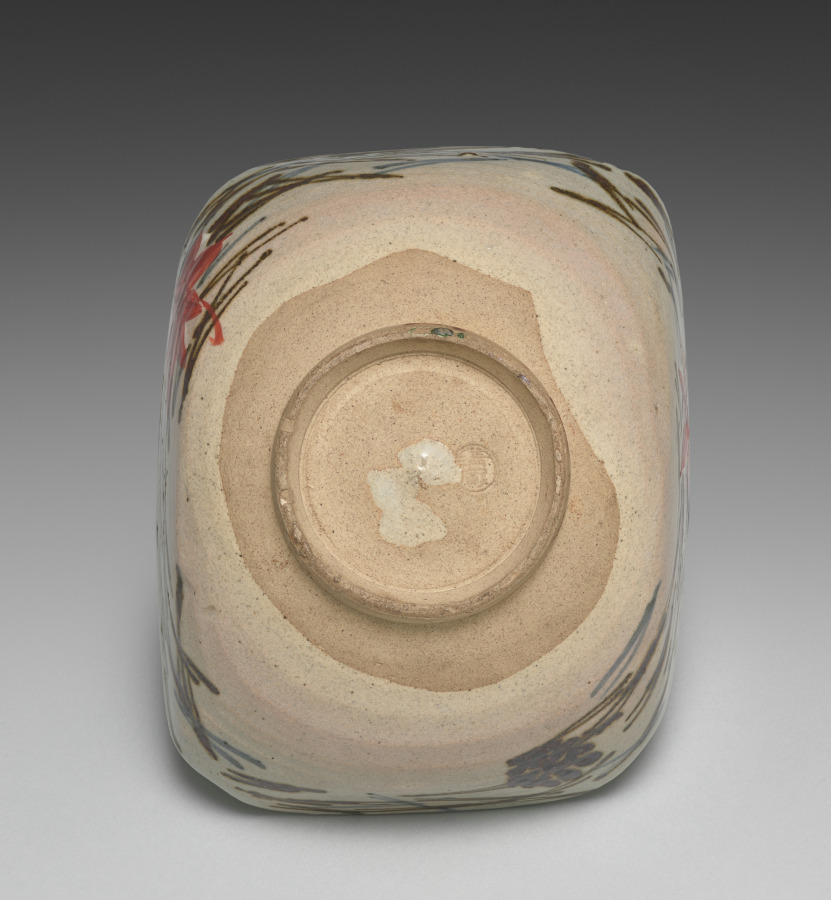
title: Nesting Dish with Scattered Pine Needles and Maple Leaves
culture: Japan, Edo period (1615–1868)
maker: Seifū Yohei I (Japanese, 1801–1861)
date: 1861–78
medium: One of a pair of side dishes; stoneware with underglaze blue and iron oxide, white slip, and overglaze color enamel (Kyoto ware)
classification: Ceramic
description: Seifū Yohei I made both blue and white porcelains after Ming dynasty (1368–1644) Chinese wares fired in the kilns at Jingdezhen for export. He also made colorful stoneware in the style of his teacher, Nin’ami Dōhachi (Takahashi Dōhachi II) (1783–1855).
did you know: The smaller dish is stamped with one of Yohei I’s seals.